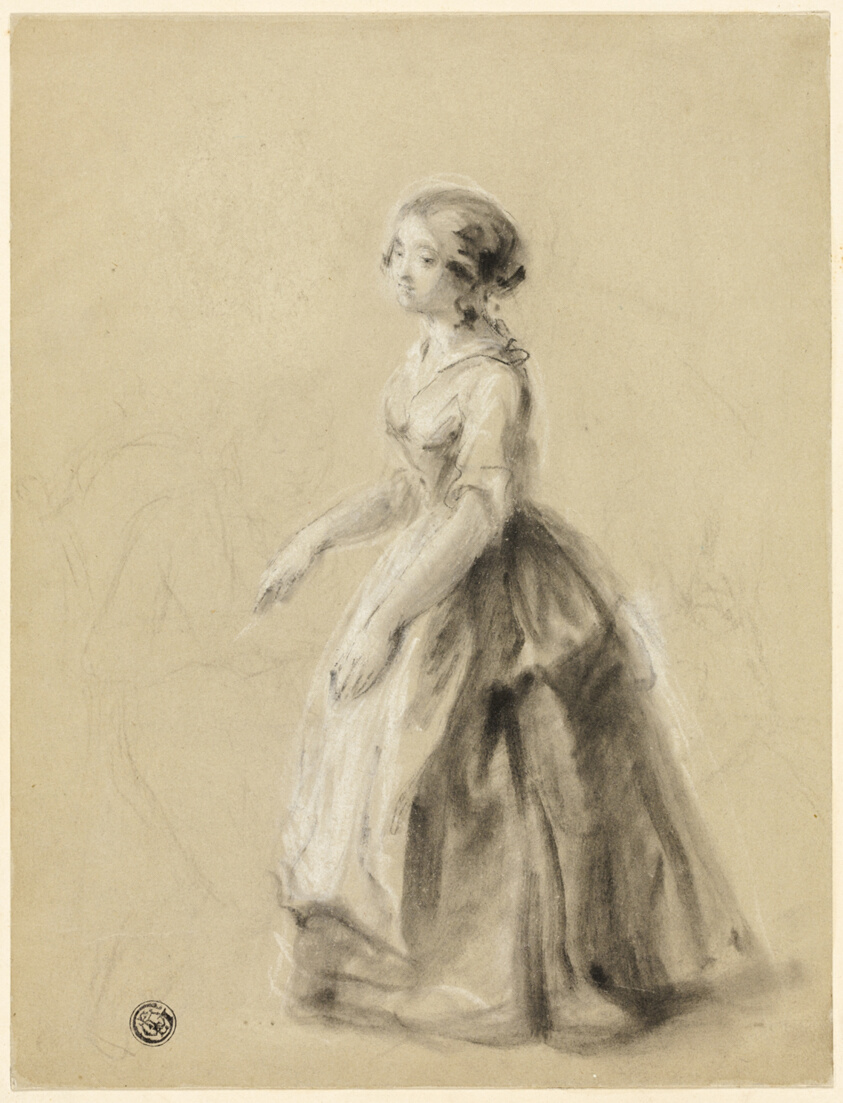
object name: Drawing and Watercolor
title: Girl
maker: Attributed to William Mulready; English, born Ireland, 1786-1863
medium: Black and white chalk with stumping, on gray wove paper, laid down on board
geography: England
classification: chalk; drawings (visual works); prints and drawing